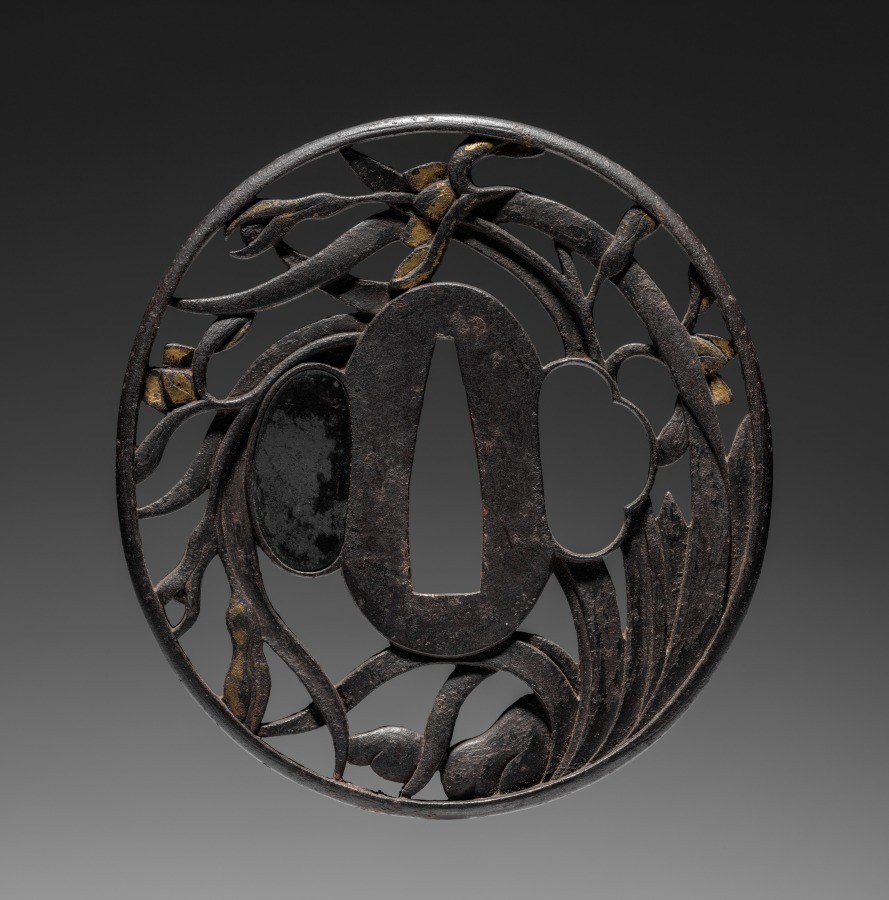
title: Sword Guard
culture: Japan, Edo period (1615–1868)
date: 1615–1868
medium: iron (Choshu type)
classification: Arms and Armor